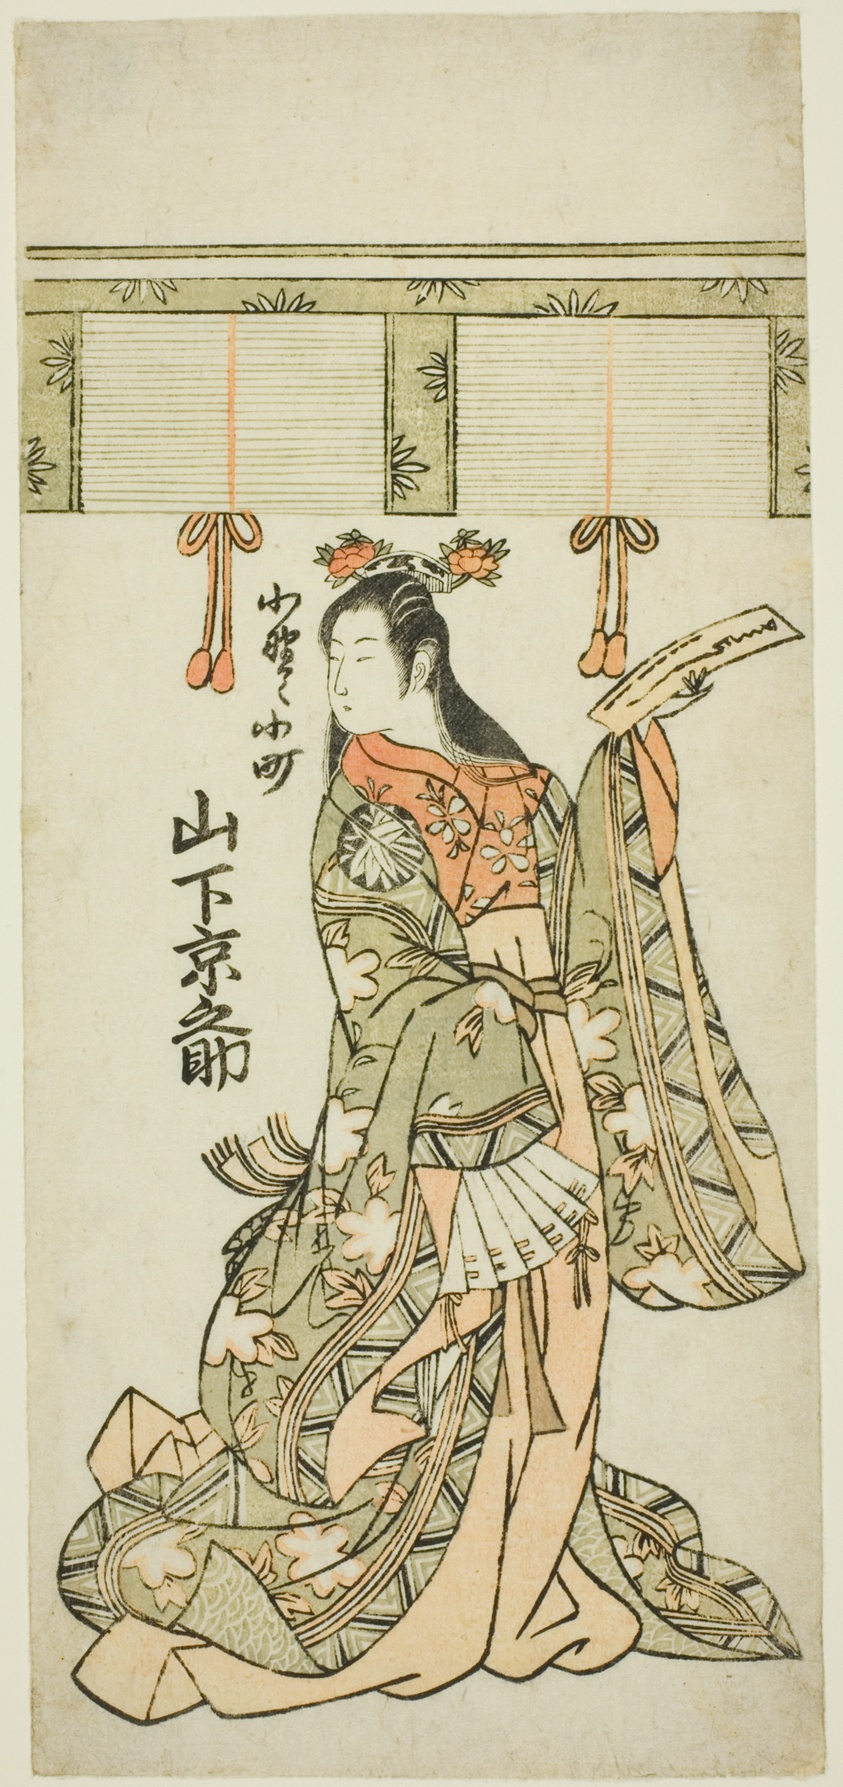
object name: Print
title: Yamashita Kyonosuke as Ono no Komachi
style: Japanese (culture or style)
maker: Artist unknown; Japanese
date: Edo period (1615–1868), 1768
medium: Color woodblock print; hosoban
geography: Japan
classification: woodblock print; print; asian art